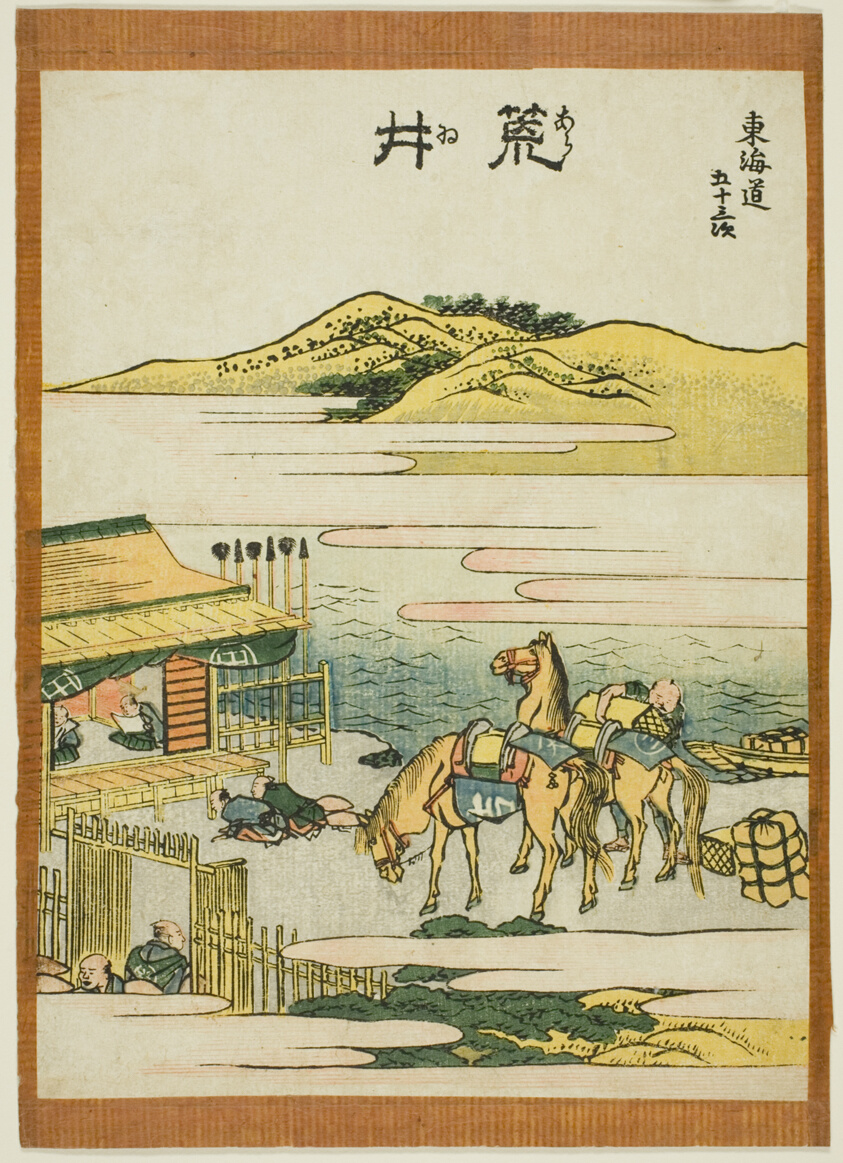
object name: Print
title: Arai, from the series "Fifty-three Stations of the Tokaido (Tokaido gojusan tsugi)"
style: Japanese (culture or style)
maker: Katsushika Hokusai 葛飾 北斎; Japanese, 1760-1849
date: c. 1806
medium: Color woodblock print; chuban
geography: Japan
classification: woodblock print; print; asian art